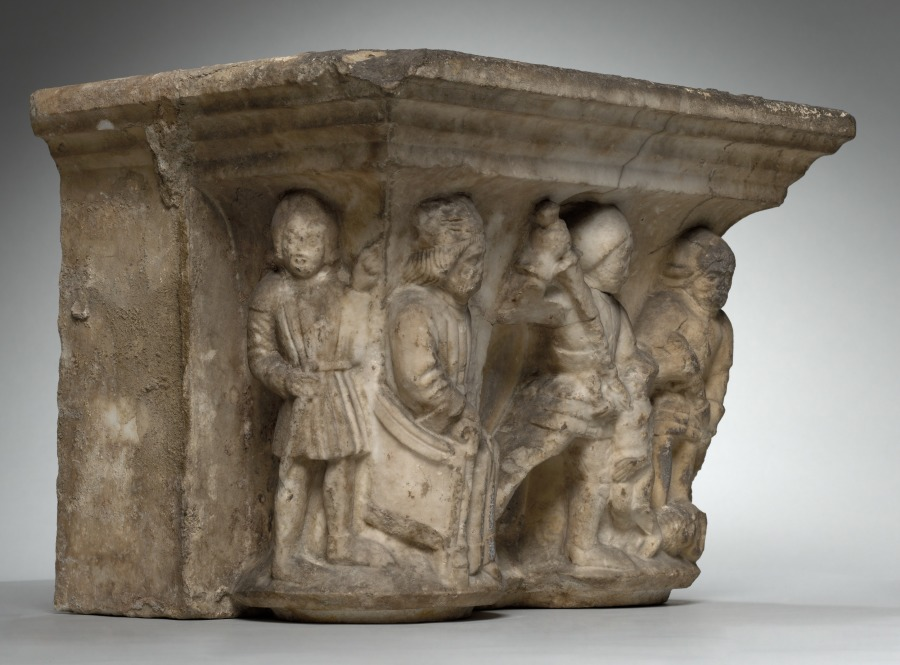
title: Engaged Capital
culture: Southern France, Abbey of Larreule, near Tarbes, 15th century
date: 1400s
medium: limestone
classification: Sculpture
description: This capital belongs to a surviving group including other architectural fragments that once decorated the cloister of the Abbey of Larreule. A cloister was a covered walkway or arcade, usually around all four sides of a square area of grass (the "cloister garth"). The seclusion of the cloister was the monks’ exclusive domain, off limits to others. Here, the monks were supposed to pray, study, meditate, and exercise in privacy and solitude. Such cloister capitals served both to instruct the monks and as a focus for their devotions. Other capitals in this series are installed in the Jardin Massey at Tarbes, near the original abbey. An arch from Larreule has been assembled with other associated French capitals at The Cloisters in New York.